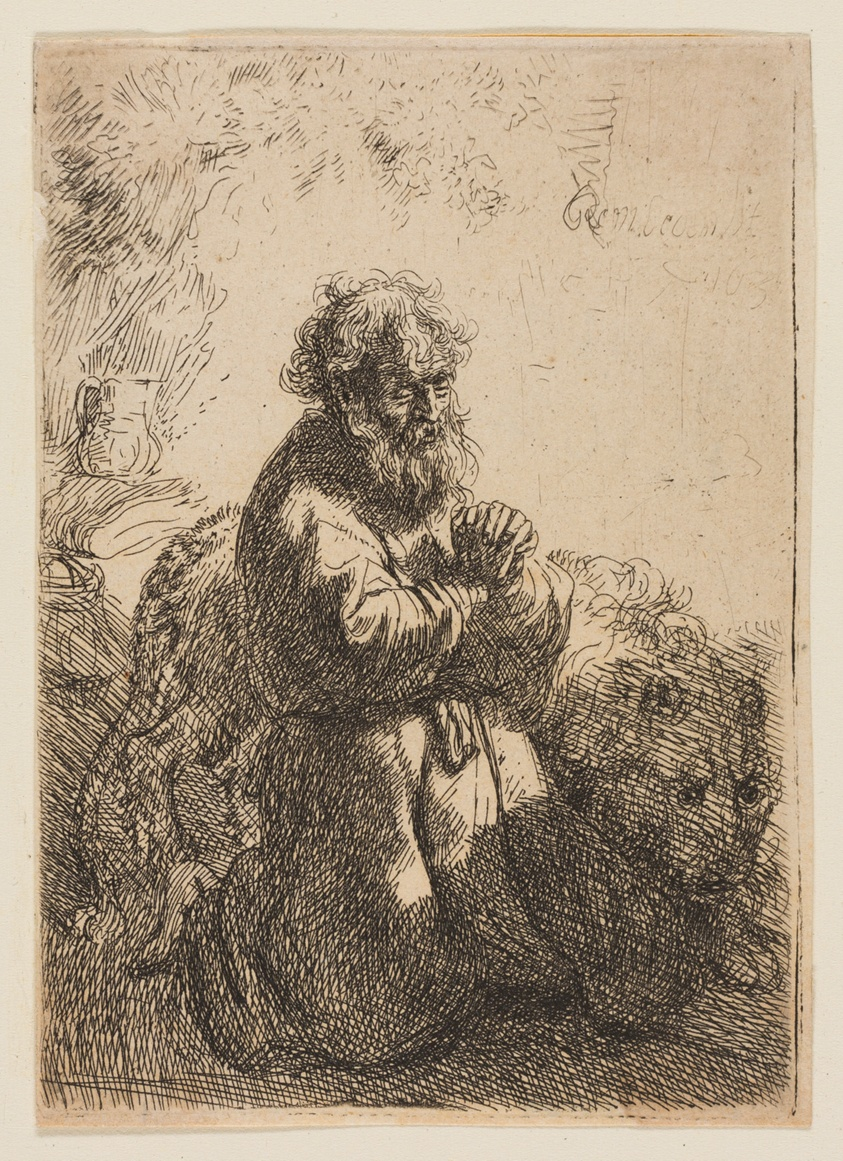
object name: Print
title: St. Jerome Kneeling in Prayer, Looking Down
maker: Rembrandt van Rijn (Dutch, 1606-1669)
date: 1635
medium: Etching on paper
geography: Holland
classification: etching; print; prints and drawing; paper